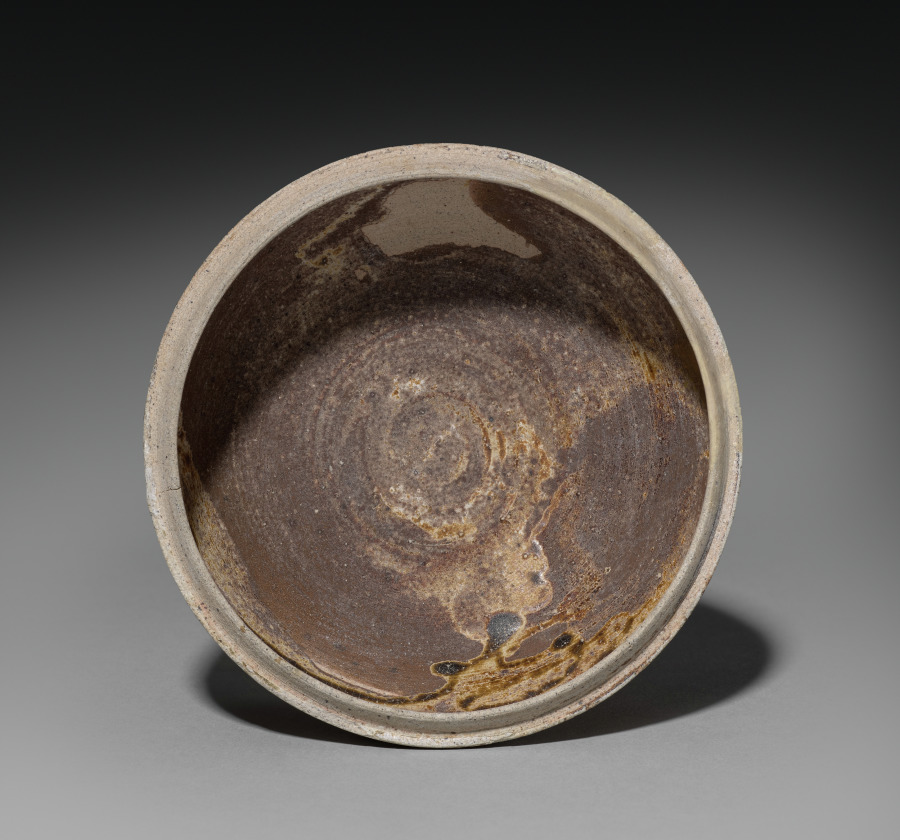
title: Covered Jar, Sawankhalok ware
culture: Thailand, Sukhothai Period, 14th century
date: 1300s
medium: pottery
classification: Ceramic